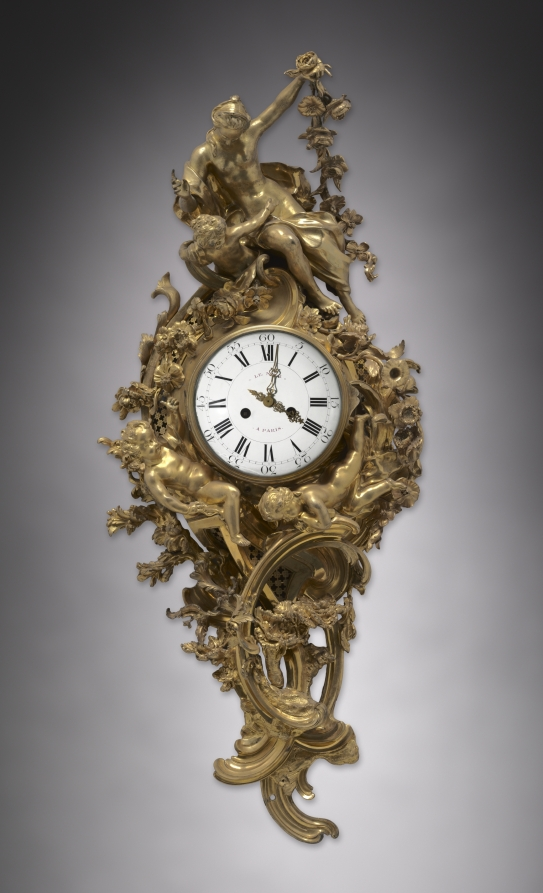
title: Wall Clock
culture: France, 18th century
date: c. 1750–1760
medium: gilt bronze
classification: Furniture and woodwork